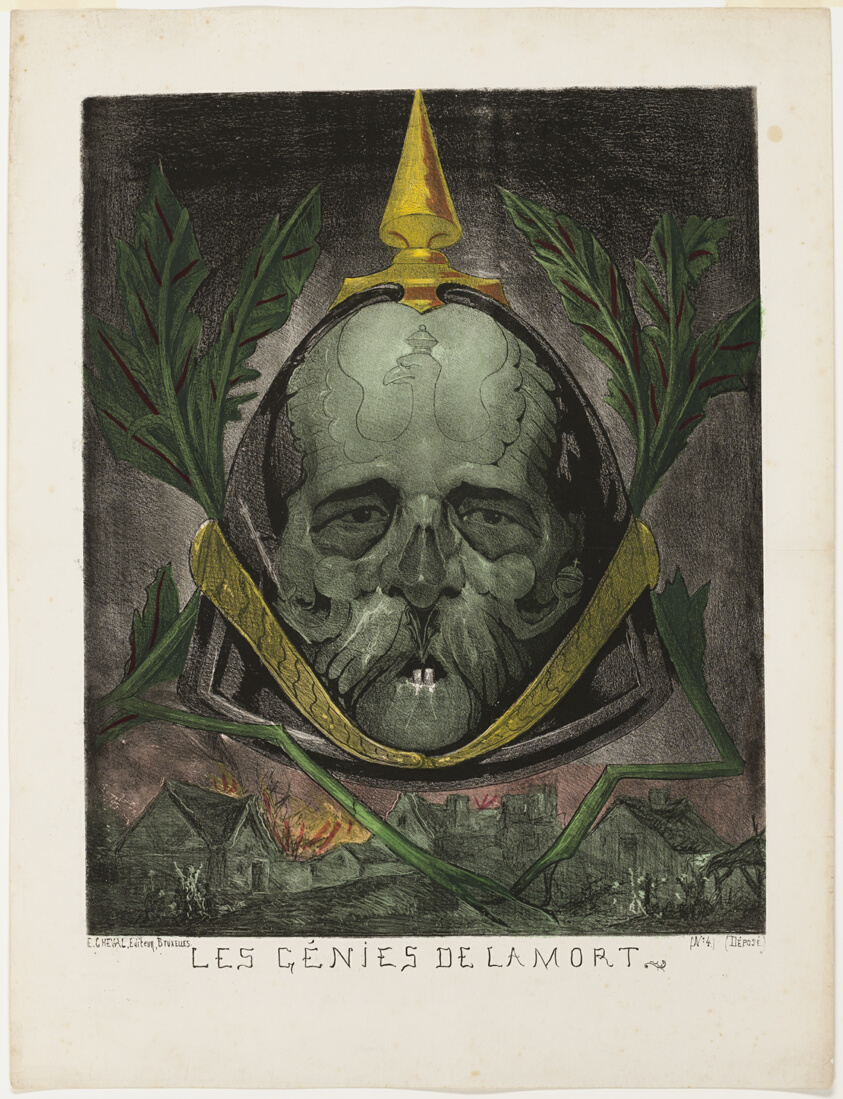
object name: Print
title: Bismarck, from Les Génies de la Mort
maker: Edmond Guilliaume (French, active 1870s)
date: 1870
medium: Color lithograph on ivory wove paper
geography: France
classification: lithograph; print; prints and drawing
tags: war